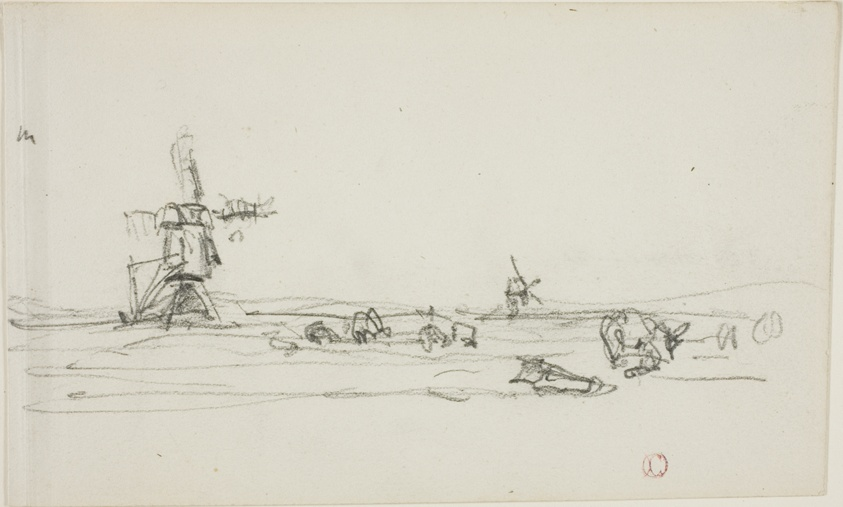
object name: Drawing and Watercolor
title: Landscape in Holland (recto); Sketch of Windmills by Water (verso)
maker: Charles François Daubigny (French, 1817-1878)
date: 1837/78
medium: Graphite (recto and verso) on ivory wove paper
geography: France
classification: graphite; drawings (visual works); prints and drawing